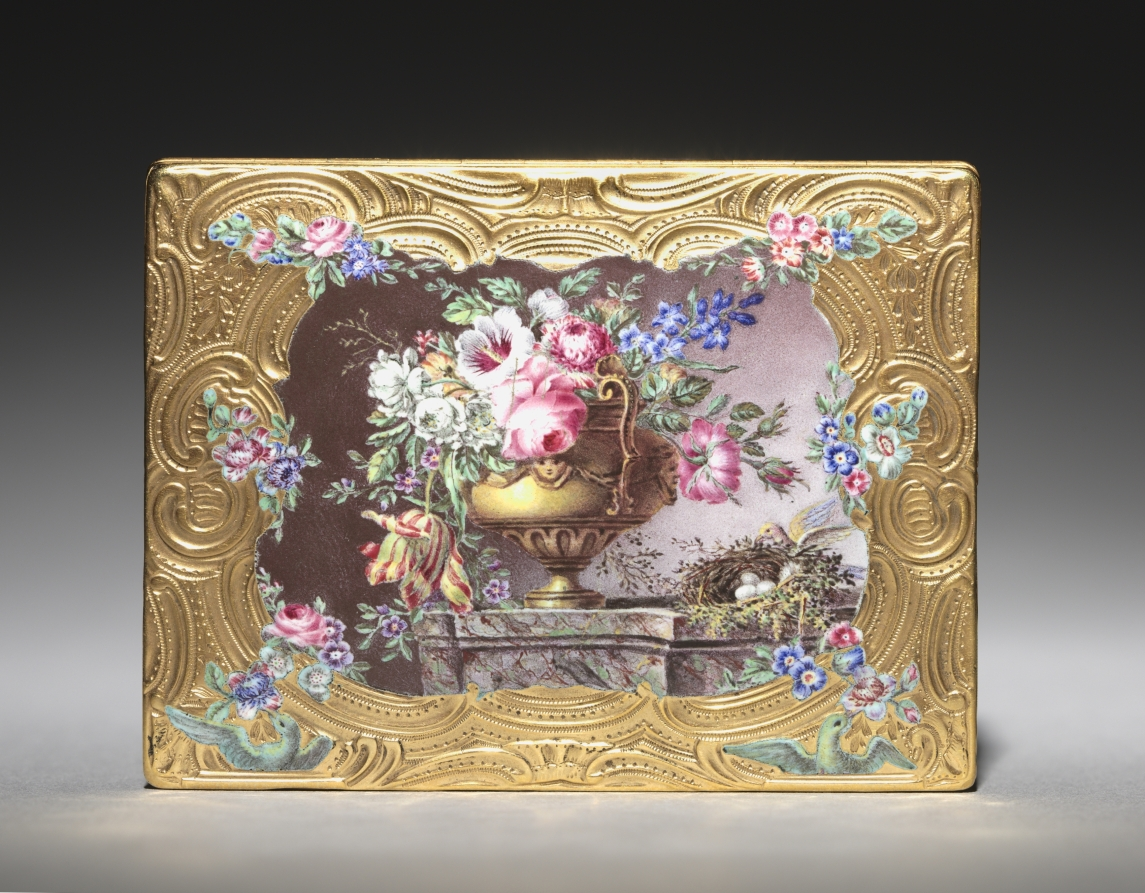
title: Snuff Box (Tabatière)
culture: France, 18th century (style of Louis XV)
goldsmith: Francois Guillaume Tiron (French)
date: 1756–57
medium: gold and enamel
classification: Miscellaneous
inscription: [Maker's mark of Francois-Guillaume Tiron, master goldsmith in 1747, inside cover; left wall]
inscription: [Warden's mark for Paris, 1756-1757, inside cover]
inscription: [Charge mark of Julien Berthe, Paris, 1750-1756, inside cover; left wall]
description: The miniature paintings that decorated snuff boxes were depicted in intricate detail requiring complex technical skill. This box’s miniatures are painted with enamel en plein, meaning the enamel has been applied directly to the metal of the box. A different enameling technique, basse-taille, is used to depict the doves and floral borders. Here, the gold has been chiseled away and filled with translucent enamel in order to produce a three-dimensional effect.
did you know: In the mid-1700s François-Guillaume Tiron worked alongside his brother, Jean-Marie Tiron, one of the most celebrated makers of gold boxes of the 18th century.